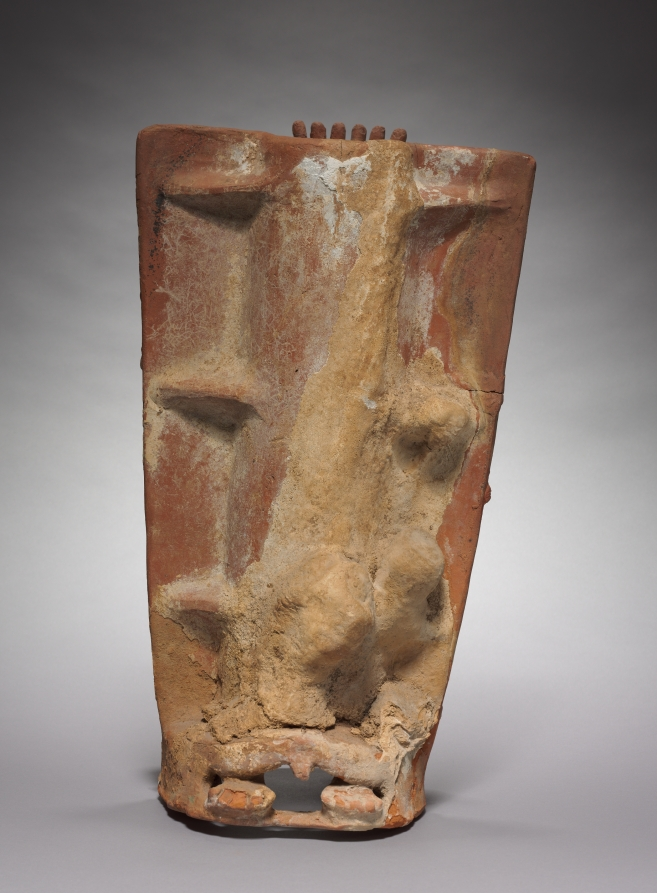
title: Incense Burner Support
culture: Mexico, Chiapas, Palenque Region, Maya, Classic period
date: 600–900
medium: pottery with polychrome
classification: Sculpture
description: This stand, made of a large tube with side panels, originally held a bowl used to ritually burn incense. Modeled on the front is a group that includes the Maya sun deity and two flanking, profile figures in lower relief. All are supported by a turtle, a symbol of the earth and the underworld. Thus, the ensemble may be a model of the cosmos.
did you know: Calcium deposits indicate this incense burner was found in a cave, which the Maya viewed as entrances to the underworld.